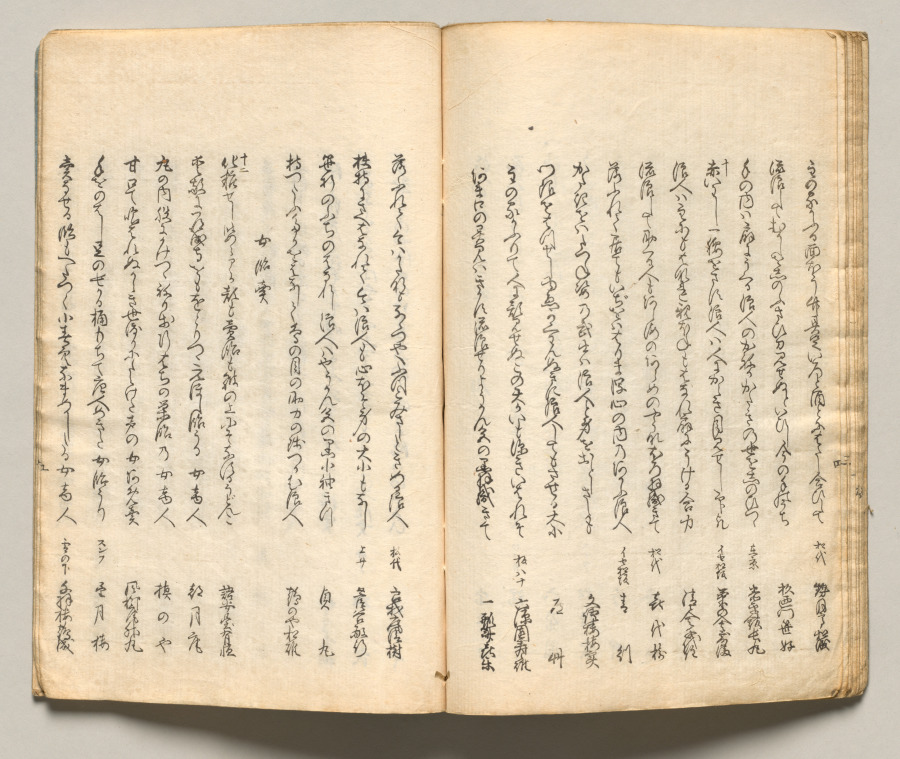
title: Spread Thirteen from Volume Seven of People of Japan in Light Verse (Kyōka)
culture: Japan, Edo period (1615–1868)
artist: Utagawa Hiroshige (Japanese, 1797–1858)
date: 1857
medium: Woodblock-printed book; ink and color on paper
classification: Bound Volume